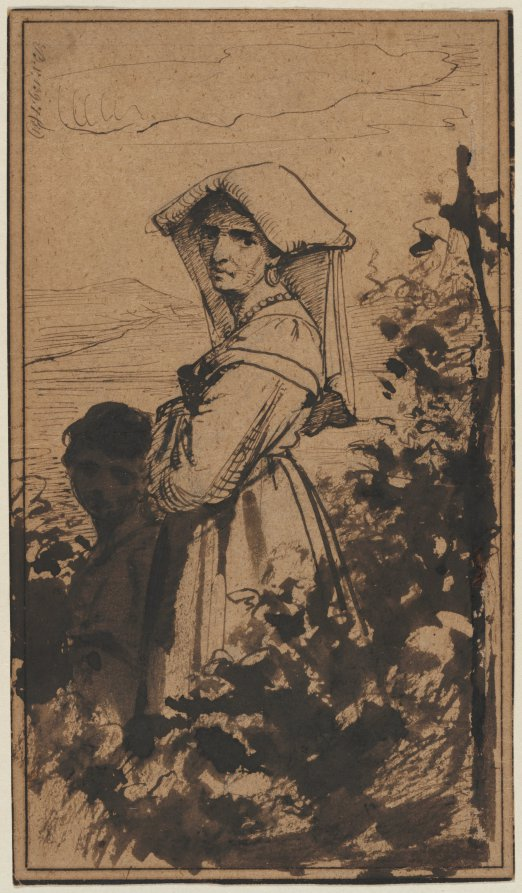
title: Standing Woman and Child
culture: Denmark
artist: Carl Bloch (Danish, 1834–1890)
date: 1850–90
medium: pen and brown ink, brush and brown wash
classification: Drawing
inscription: upper right, in brown ink: "PB. v. 139.7 (81)"; verso, in brown ink: "Carl Bloch. fecit"